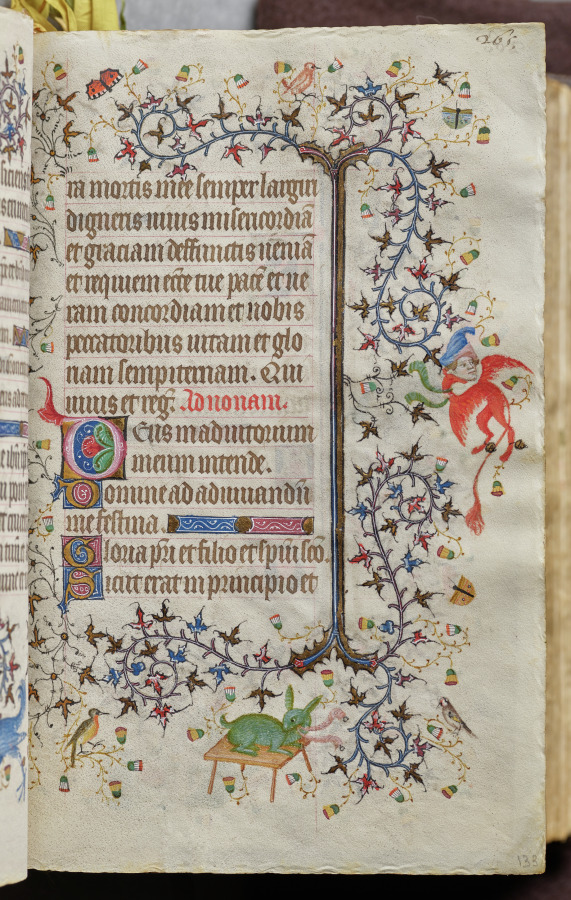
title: Hours of Charles the Noble, King of Navarre (1361-1425): fol. 133r, Text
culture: France, Paris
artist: Master of the Brussels Initials and Associates (French)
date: c. 1405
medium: ink, tempera, and gold on vellum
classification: Bound Volume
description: This precious volume was obviously highly prized by its owner, the French-born King of Navarre, who had his coat of arms painted on no less than twenty folios. Rather than directly commissioning this manuscript from a specific workshop, it seems that Charles the Noble acquired his book of hours -- perhaps ready-made for the luxury market -- while on a trip to Paris in 1404-05. A collaborative effort, six painting styles are evidenced within the pages of this codex, those of two Italians, two Frenchmen, and two Netherlanders. The painter who was responsible for the planning and decoration of the book, and who produced seventeen of the large miniatures, was a Bolognese artist known as the Master of the Brussels Initials. His principal assistant, responsible for most of the borders, was a Florentine who signed his name "Zecho" da Firenze on folio 208 verso.